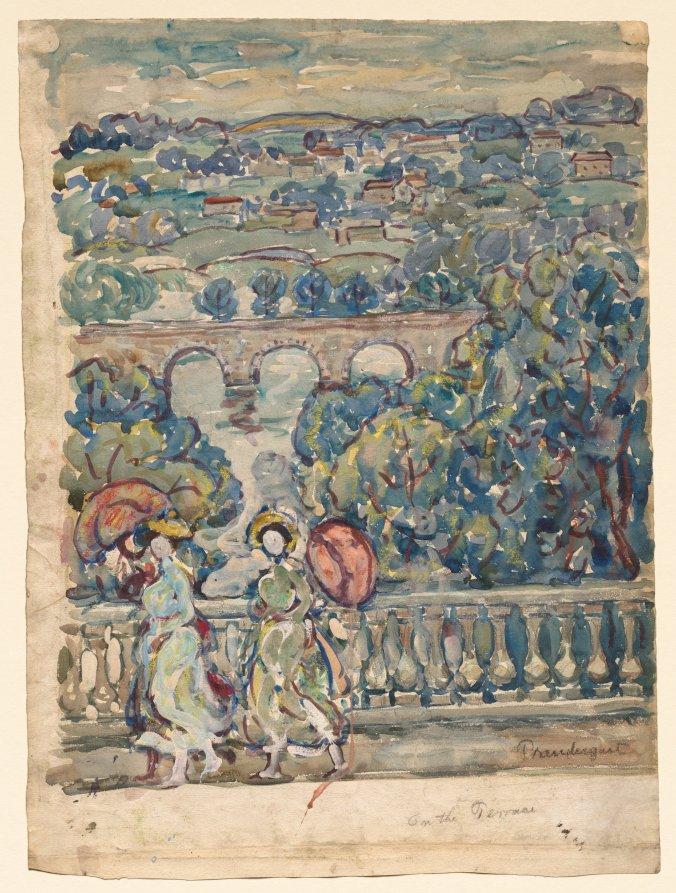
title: From the Terrace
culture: America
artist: Maurice Prendergast (American, born Newfoundland [now Canada], 1858–1924)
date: 1912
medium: watercolor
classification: Drawing